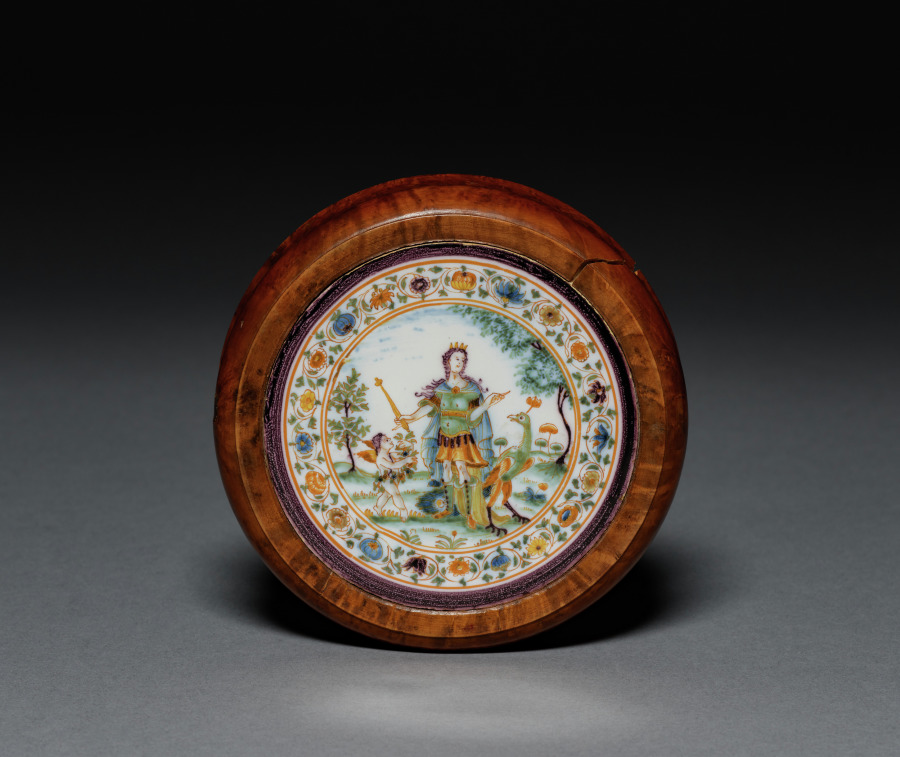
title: Box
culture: France, Moustiers, 18th century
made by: Olerys Factory (French)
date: c. 1750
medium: faience encased with burled wood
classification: Ceramic